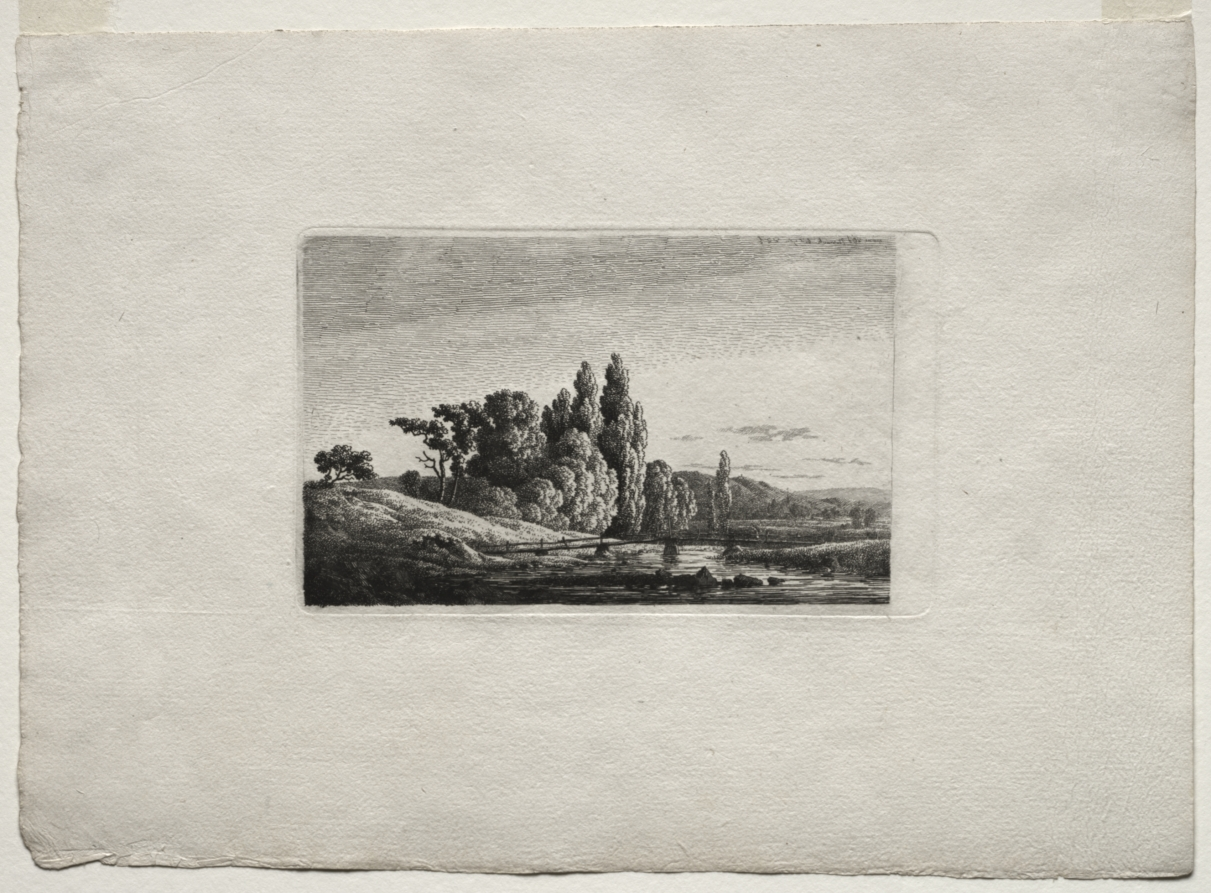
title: Footbridge with Cross before Trees at a River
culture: Germany, 19th century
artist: Caspar David Friedrich (German, 1774–1840)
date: c.1803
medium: etching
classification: Print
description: Landscape was Caspar David Friedrich’s preferred subject, and for him spending time outdoors was a religious and transcendent experience. Here, the artist presented the terrain of Northern Germany as expansive and emphasized the smallness of man next to God’s creation. The fine, dense etched lines used to depict the landscape are juxtaposed with the broad strokes that make up the sky and horizon. Friedrich experimented with printmaking for only five years, and this print is one of just a few existing impressions.